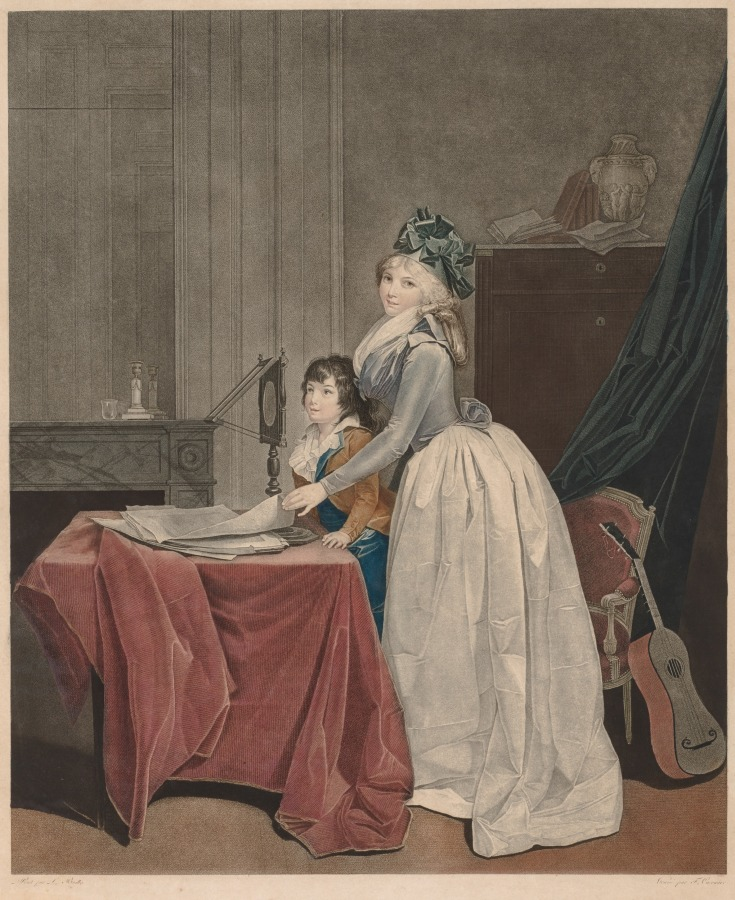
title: The Optical Viewer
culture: France, 19th century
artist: Frédéric Cazenave (French, active 1793–1843)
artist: after Louis Léopold Boilly (French, 1761–1845)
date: c. 1794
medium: etching and engraving hand colored with watercolor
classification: Print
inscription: below border, lower left: Peint par L. Boilly; below border, lower right: Gravé par F. Cazenave.; in margin: L'Optique.; bottom center: A Paris chez L'Auteur, Rue Jacques N°. 13 en face de la rue de la Parcheminierie./ Imprimé par Finot